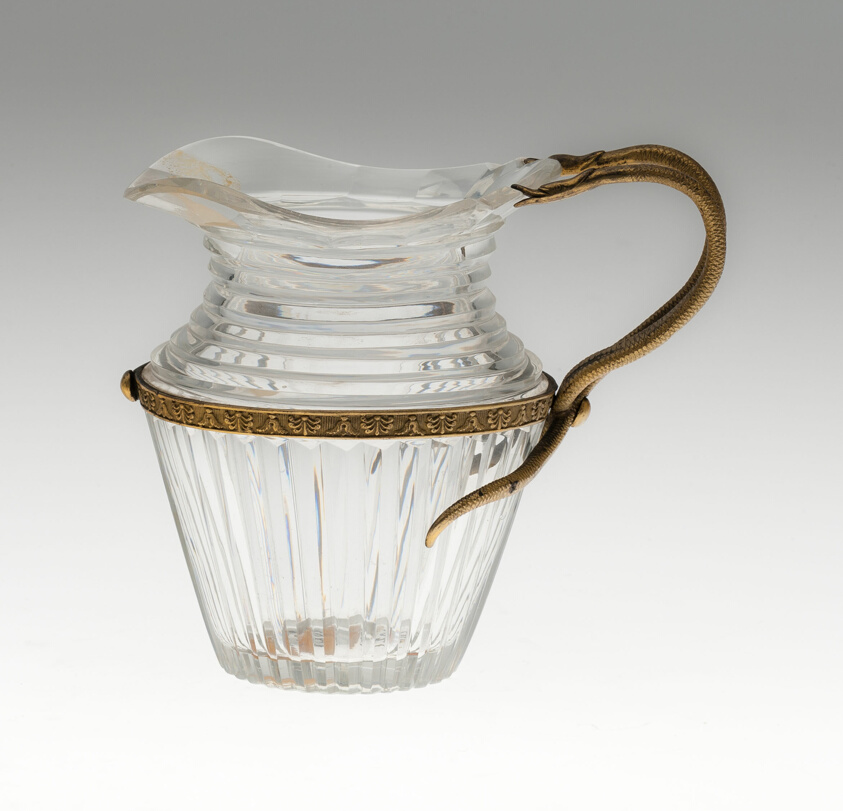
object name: Glass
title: Pitcher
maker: Germany or Russia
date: Possibly 19th century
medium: Glass; molded and cut, gilt bronze mounts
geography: Germany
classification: pitcher (vessel); glass; vessel; european decorative arts